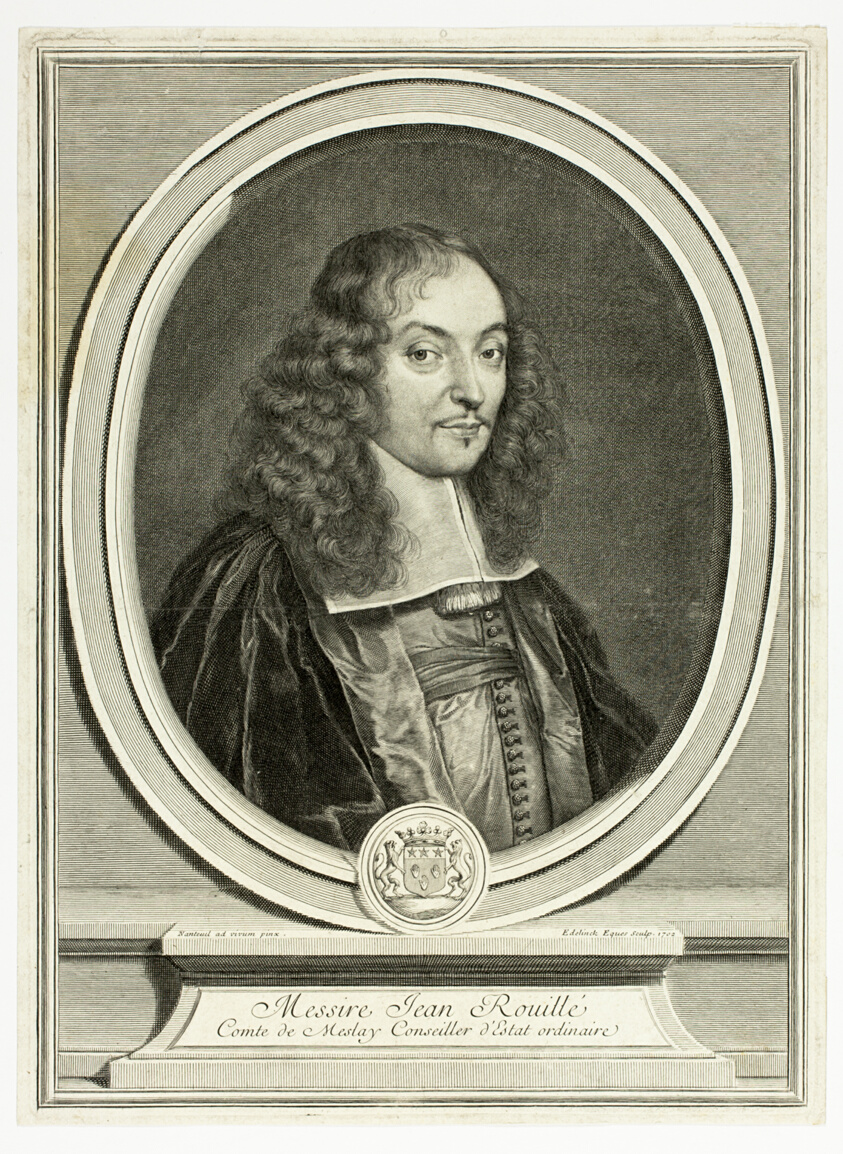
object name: Print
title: Sir Jean Rouillé, Count of Meslay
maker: Gérard Edelinck (French, born Flanders, 1640-1707); after Robert Nanteuil (French, 1623-1678)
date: 1702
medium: Engraving on ivory laid paper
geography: France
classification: engraving; print; prints and drawing